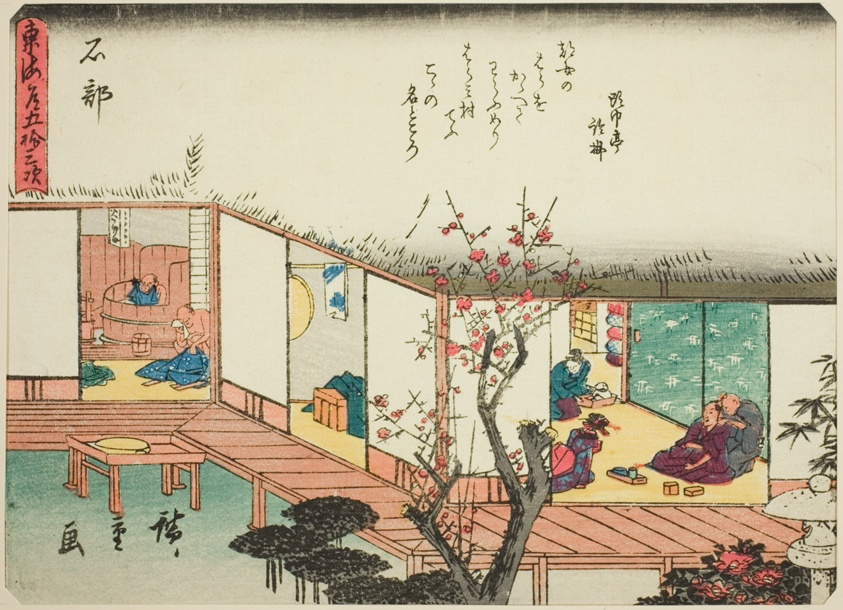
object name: Print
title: Ishibe, from the series "Fifty-three Stations of the Tokaido (Tokaido gojusan tsugi)," also known as the Tokaido with Poem (Kyoka iri Tokaido)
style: Japanese (culture or style)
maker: Utagawa Hiroshige 歌川 広重; Japanese, 1797-1858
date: c. 1837/42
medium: Color woodblock print; chuban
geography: Japan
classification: woodblock print; print; asian art